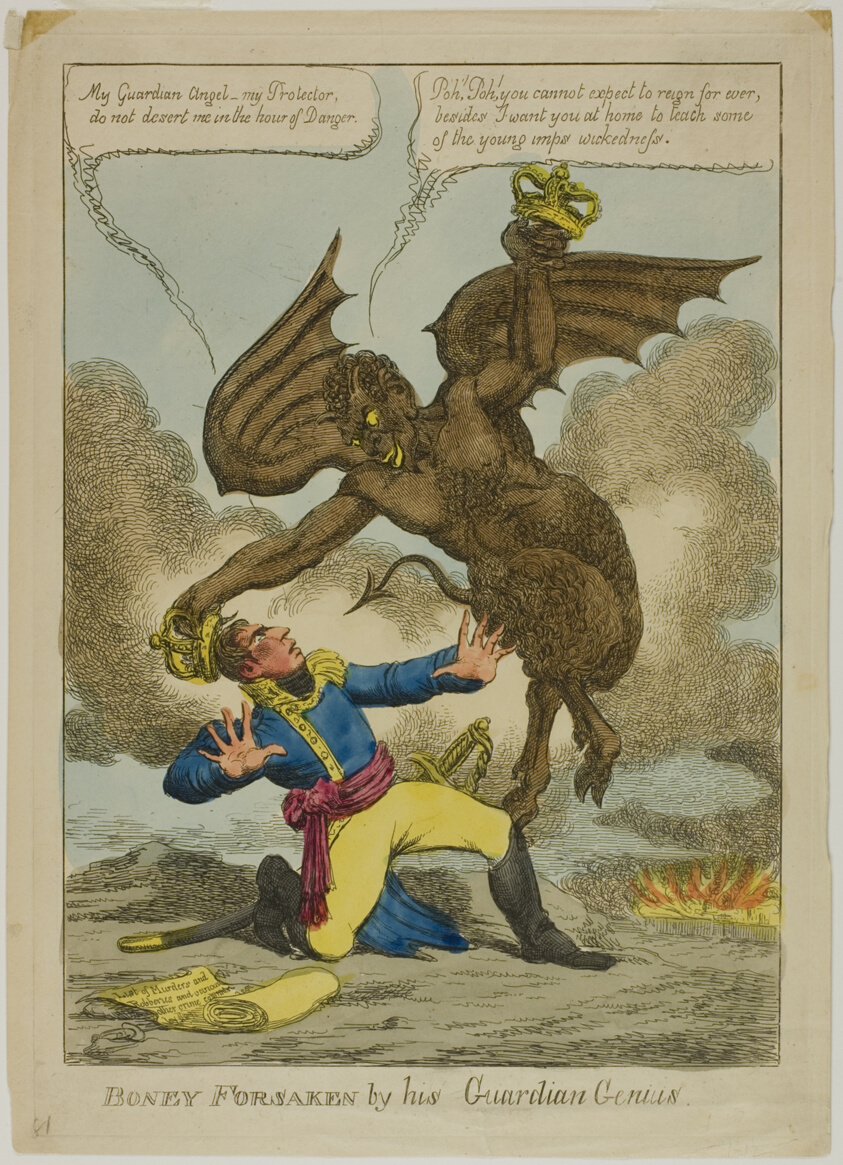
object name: Print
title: Boney Forsaken by his Guardian Genius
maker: Charles Williams (English, active 1797-1830)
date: 1814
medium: Etching in black, with hand-colored additions, on cream wove paper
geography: England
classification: wood engraving; print; prints and drawing